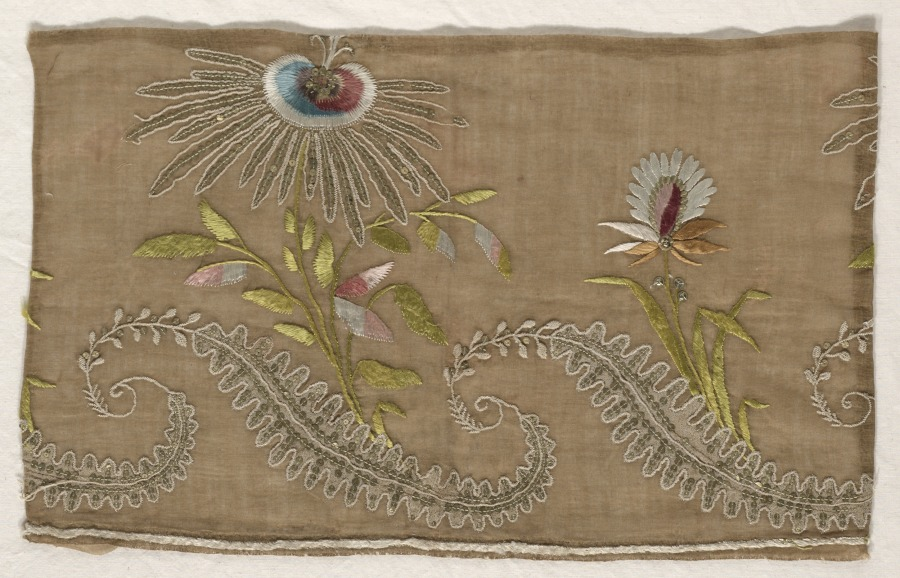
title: Two Fragments of Embroidery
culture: Spain, Southern, 18th century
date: 18th century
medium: embroidery, silk threads on silk ground, linen appliqué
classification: Embroidery